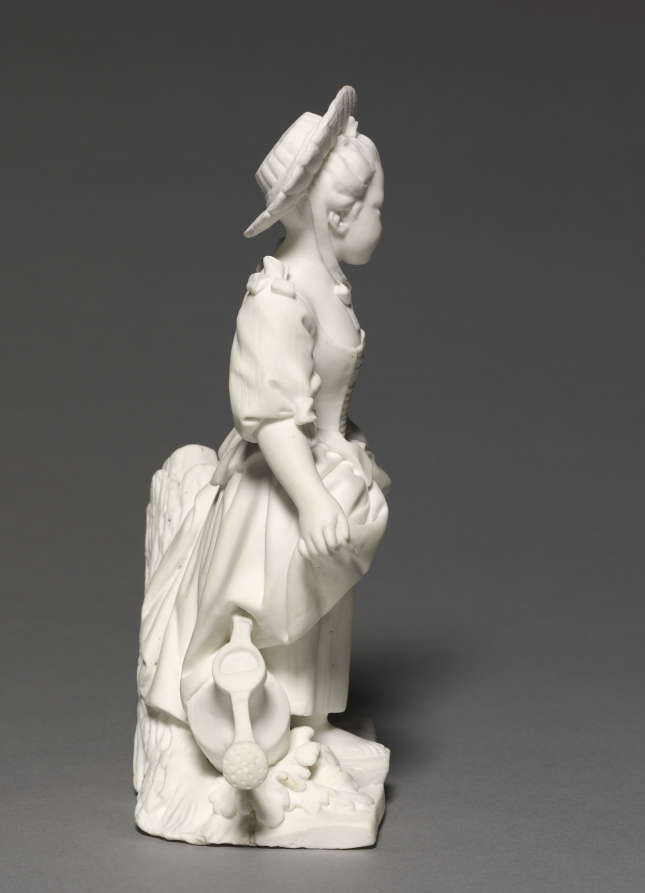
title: Figure of the Dancer (La Danseuse)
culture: France, Vincennes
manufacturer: Vincennes Porcelain Factory (France, 1740–56)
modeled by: Pierre Blondeau (French)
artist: after a design by François Boucher (French, 1703–1770)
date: 1748–52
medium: unglazed soft-paste porcelain (biscuit porcelain)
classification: Ceramic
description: Although a few Vincennes porcelain figures exist which are glazed, the royal factory adopted at an early date the practice of producing unglazed, biscuit figures which, because of the purity of their material, resemble marble figurines. The fashion for biscuit figures first introduced at Vincennes quickly spread through Europe.